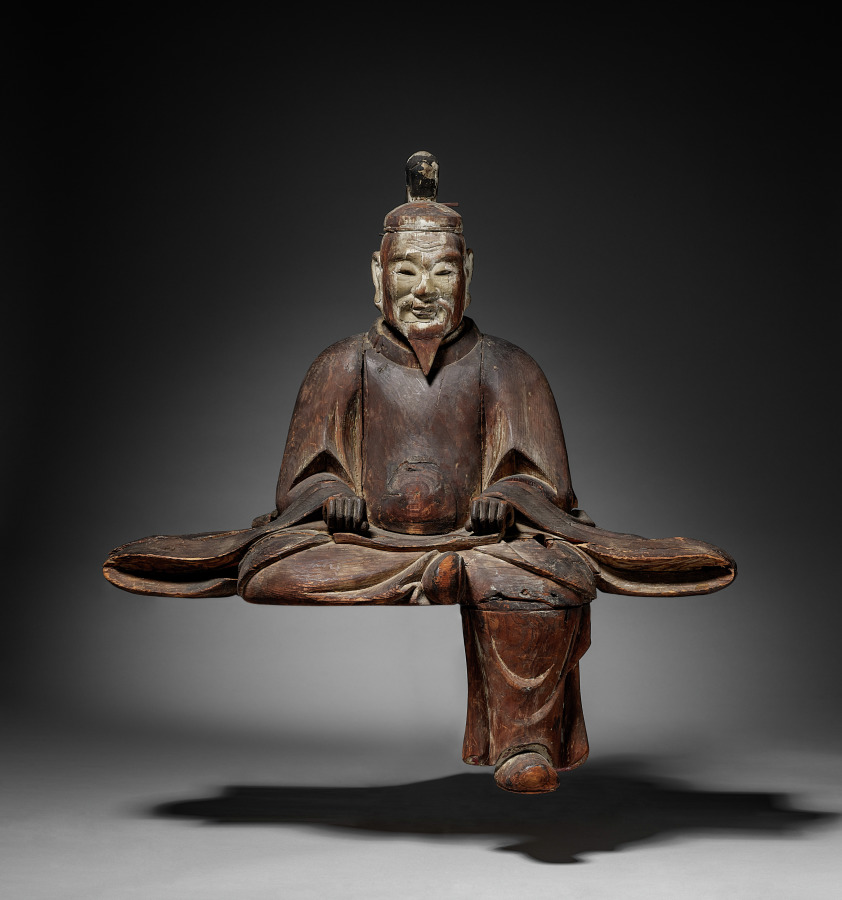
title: One of a Pair of Guardian Figures (Zuishin)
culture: Japan, Muromachi period (1392–1573) to Edo period (1615–1858)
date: c. 1560–1625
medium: Japanese cypress (hinoki) with traces of color; crystal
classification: Sculpture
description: Sculptors carved these two figures to look like members of the guard who protected the Japanese aristocracy in the 10th to 12th centuries. The pair belong in the roofed gate of a Shinto shrine. Their role was to embody the divine protectors of the deities, or kami, residing at the shrine. Their inset crystal eyes make them appear vigilant.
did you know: Some Japanese sculptors used to specialize in inset crystal eyes.